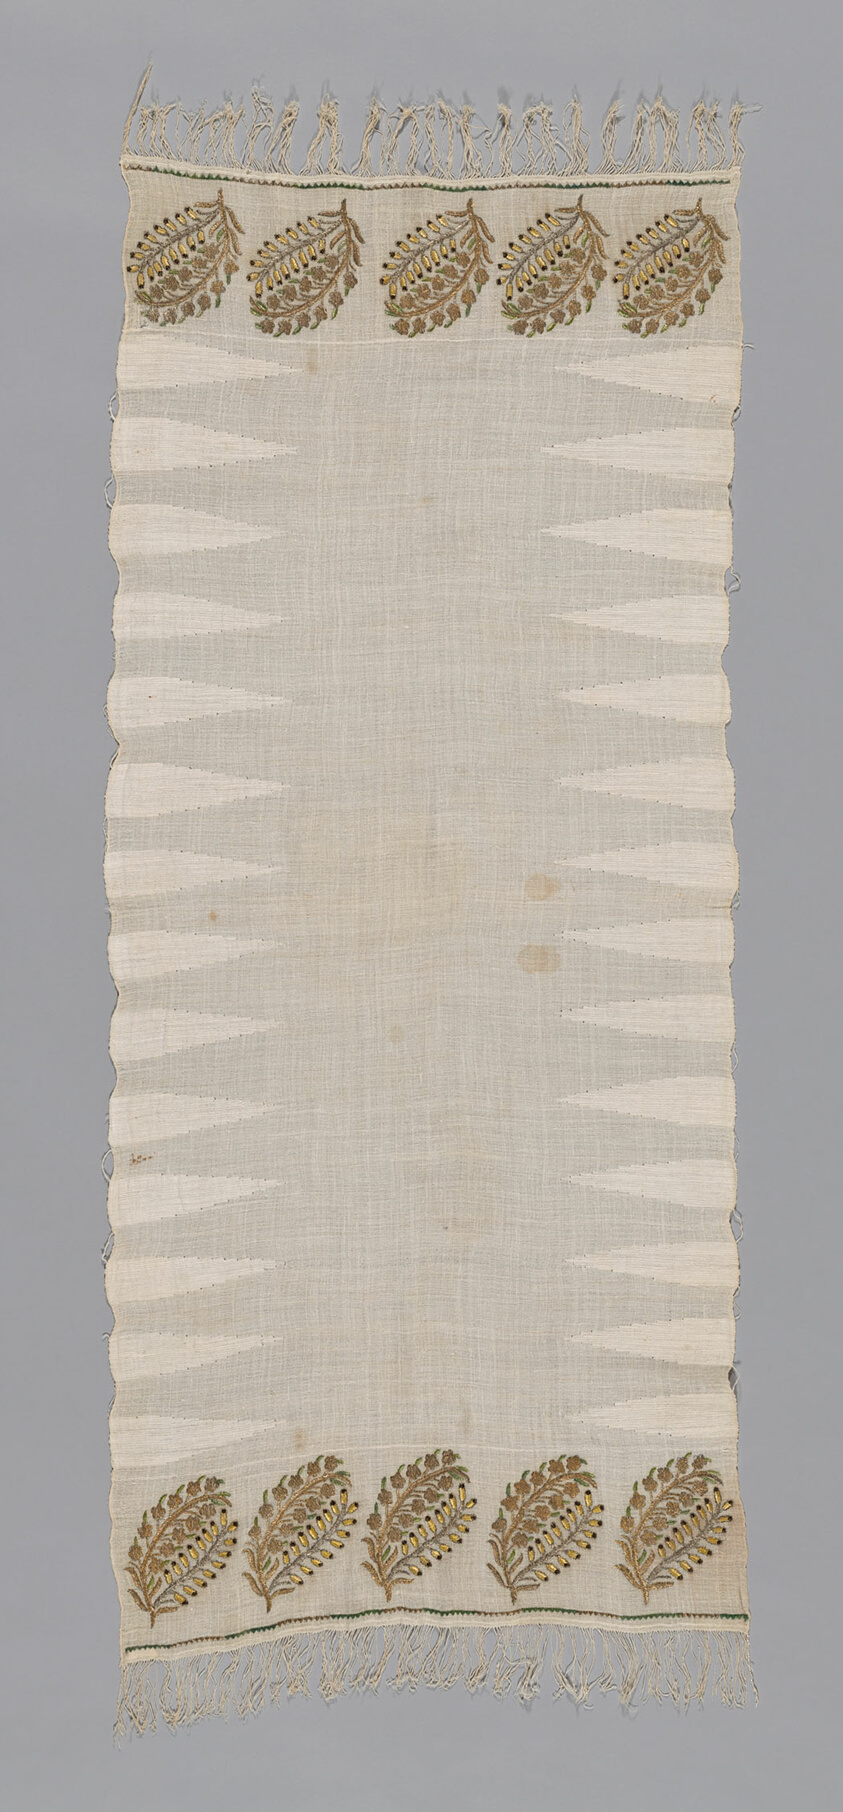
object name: Costume and Accessories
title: Sash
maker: Turkey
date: 1875/1900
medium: embroidered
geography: Turkey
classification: textile; needlework (visual works); weaving; costume